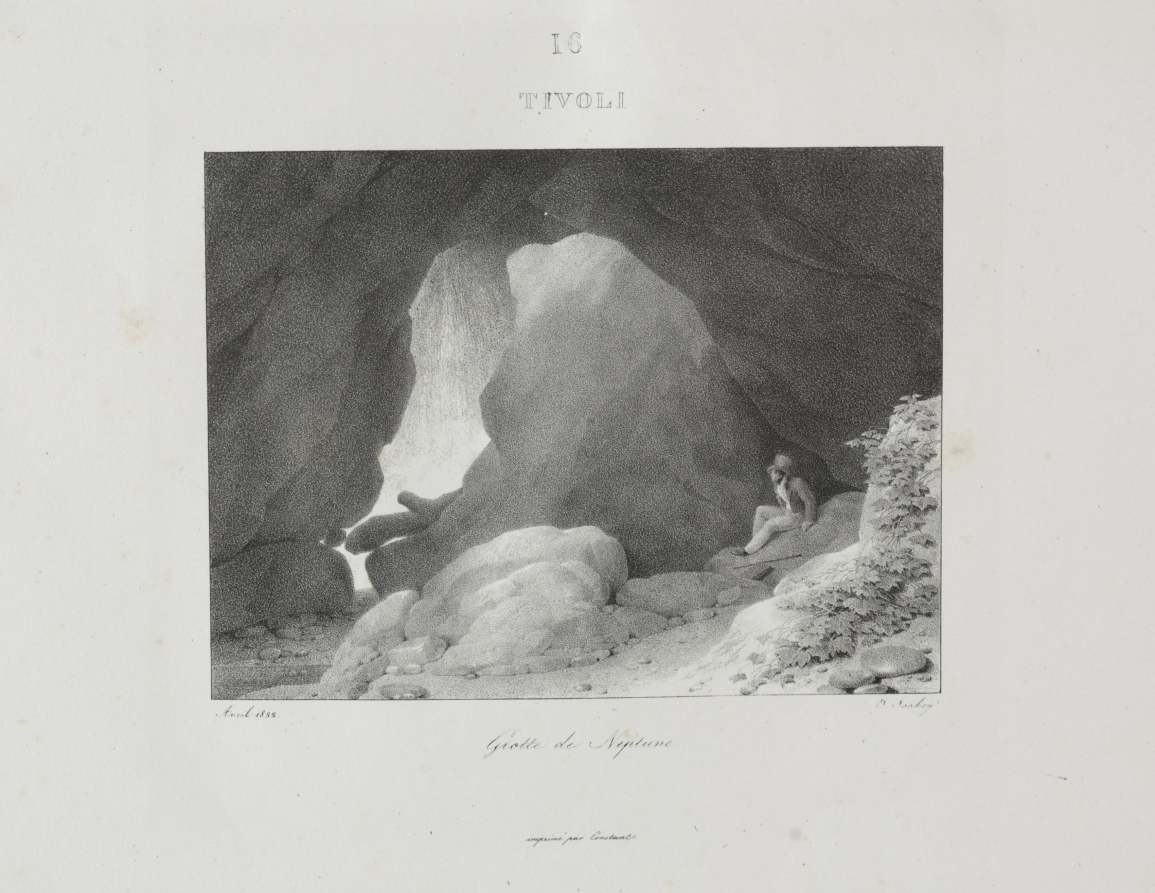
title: Voyage en Italie en 1822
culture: France, 19th century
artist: Jean-Baptiste Isabey (French, 1767–1855)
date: 1833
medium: lithograph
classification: Bound Volume